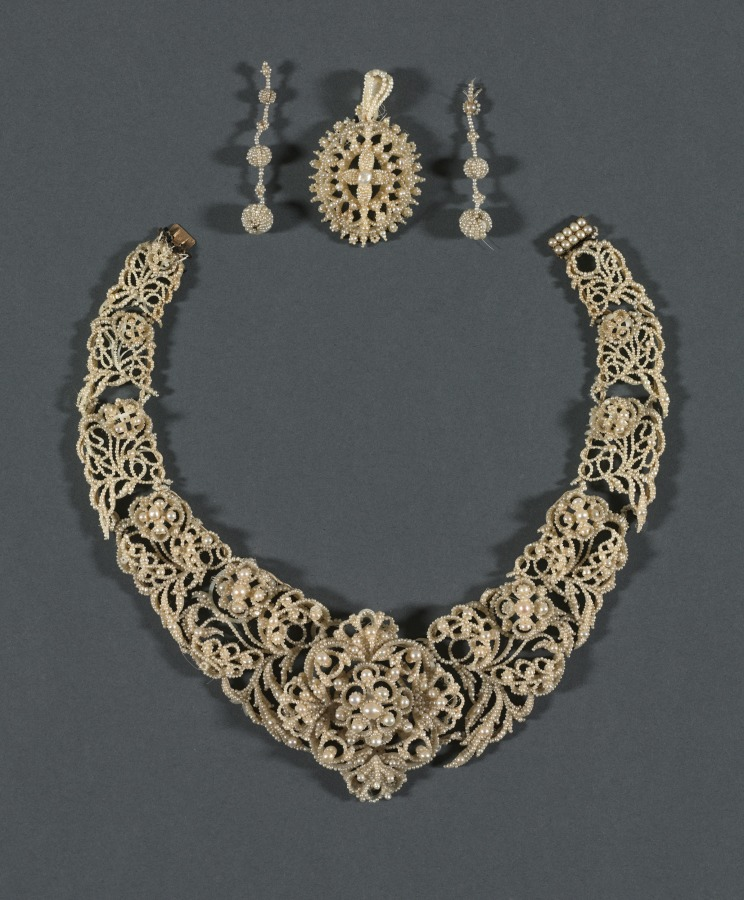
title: Parure: Necklace, Pendant, Earrings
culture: England, 19th century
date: c. 1850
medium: seed pearl on mother-of-pearl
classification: Jewelry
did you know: A parure is a set of various items of matching jewelry popular in Europe in the early 1800s; they could include a variety of pieces such as a necklace, earrings, brooch, bracelet, or tiara.